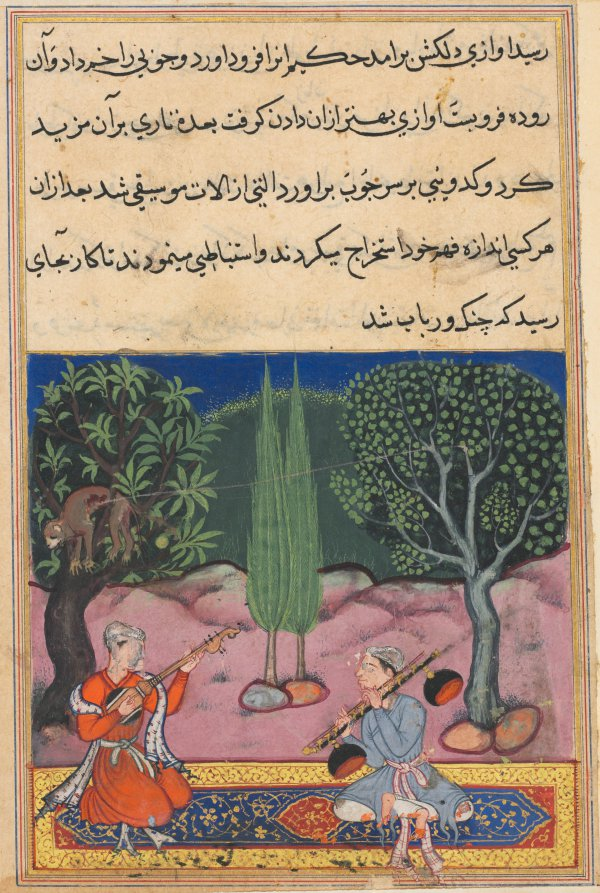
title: The invention of musical instruments from the intestines of a monkey, from a Tuti-nama (Tales of a Parrot): Fourteenth Night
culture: Mughal India, court of Akbar (reigned 1556–1605)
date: c. 1560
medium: gum tempera, ink, and gold on paper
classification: Painting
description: A monkey has been disemboweled while jumping from tree to tree. Once the intestine dried, a wise man attached it to a stick and a gourd, creating the first instrument. Instruments developed from this, called the rebab and the vina, are held by the musicians who sit beneath the trees.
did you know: The rebab-player sits on the left, while the vina-player is on the right.